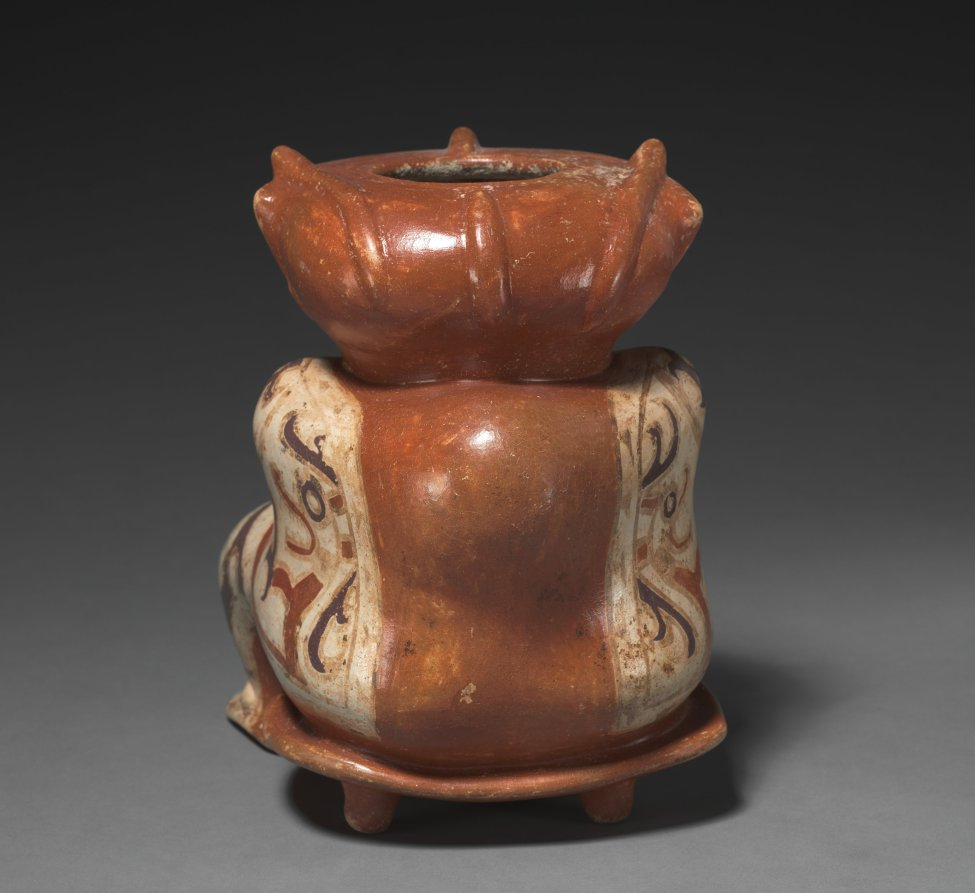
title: Hunchback Seated on a Stool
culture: Central Panama, Conte Style, c. 600-800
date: c. 600–800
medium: earthenware with colored slips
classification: Ceramic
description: The meanings of hunchbacks is not well-studied in Panamanian art. But to the north, in Mexico and Guatemala, such physical anomalies marked individuals of great spiritual power. A few of this figure’s features suggest that hunchbacks held similar status in Panama: The figure sits upon a four-legged stool, a symbol of authority, and the mythic creatures painted on each side may connect the figure to the supernatural realm.